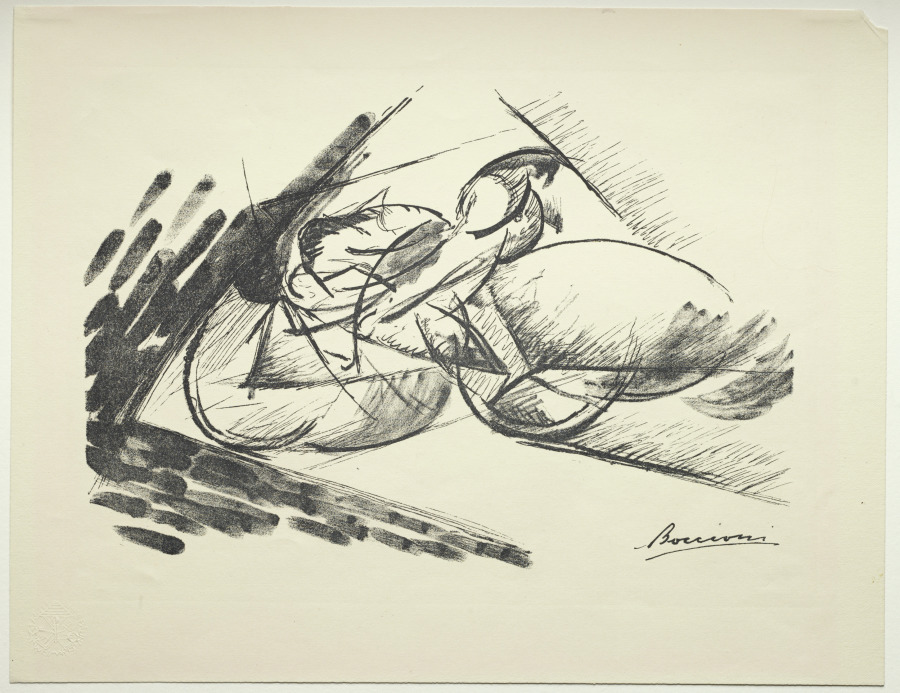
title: Movement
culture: Italy, 20th century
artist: Umberto Boccioni (Italian, 1882–1916)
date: early 1900s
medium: lithograph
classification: Print